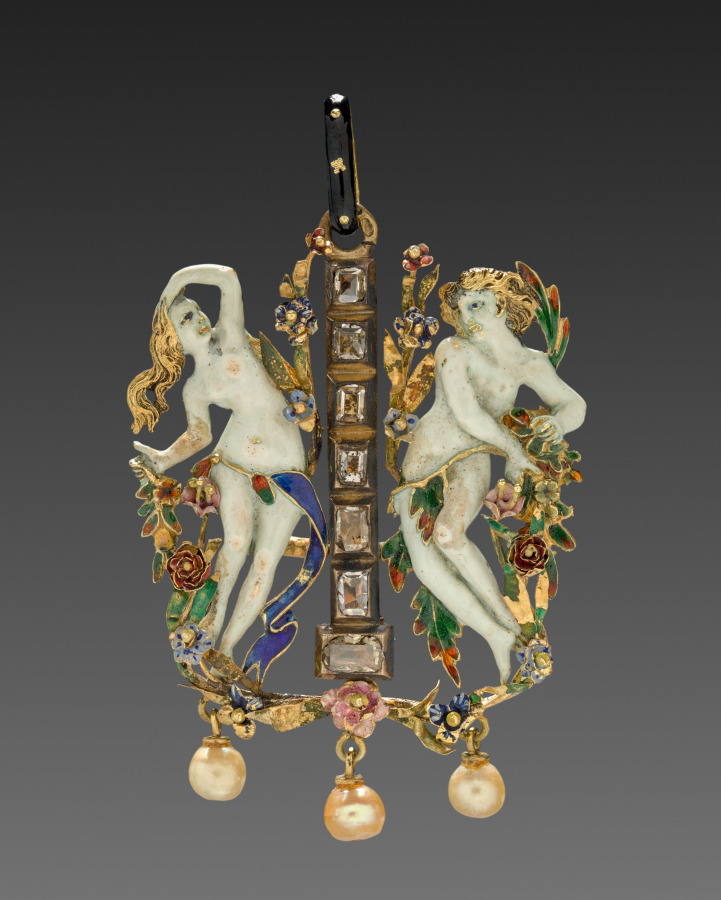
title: Pendant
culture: France, late 19th century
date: 1870–1890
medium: enameled figures surrounded by colored enameled flowers, gems and pearls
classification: Jewelry